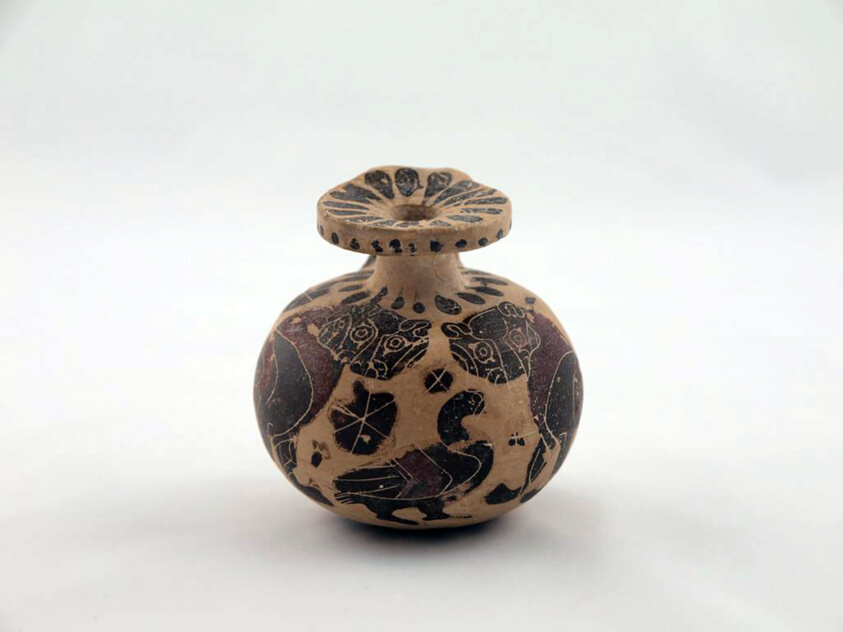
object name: Vessel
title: Aryballos (Cointainer for Oil)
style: greek, black-figure, ancient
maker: Greek; Corinth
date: 625-600 BCE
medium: terracotta, black-figure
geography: Ancient Greece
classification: vessel; ceramics; aryballos; ancient art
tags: containers